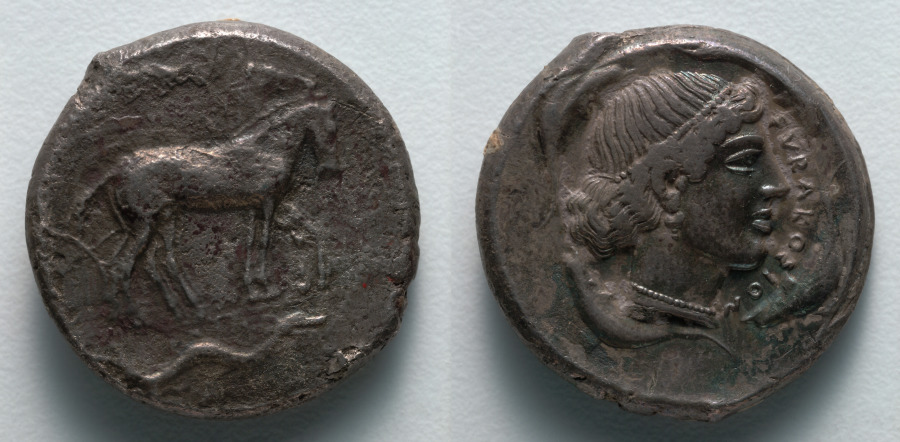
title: Tetradrachm: Quadriga (obverse); Head of Arethousa (reverse)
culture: Greek, minted at Syracuse (Sicily)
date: c. 467–440 BCE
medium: silver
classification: Coins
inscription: ΣΥΡΑΚΟΣΙΟΝ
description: On the obverse of this highly symbolic coin is the head of Arethousa, a local goddess of Syracuse who fled from mainland Greece and arose on the site as a freshwater fountain. Four dolphins swim around her, suggesting Syracuse’s humble beginnings as a small island colony. On the reverse, a racing four-horse chariot recalls Syracuse’s past victories in Panhellenic games.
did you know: Three dolphins and a bit of a fourth are still visible swimming clockwise around Arethousa.